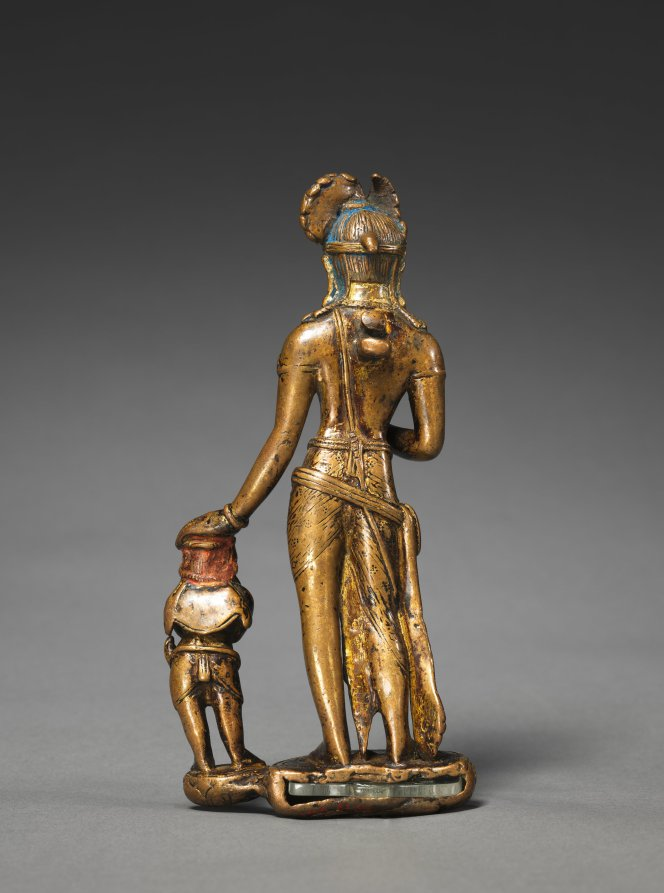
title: Bodhisattva Vajrapani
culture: Nepal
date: 700s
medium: copper with traces of gilt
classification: Sculpture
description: One of the earliest surviving tantric sculptures, this figure of Vajrapani—"he who holds the lightning bolt"—places his hand on a vajra, a thunder bolt symbol that refers to the lightning speed with which practitioners may achieve enlightenment when they follow tantric techniques. The prongs of the lightning bolt are in his hair; his arms are crossed, and a knotted snake is slung around his hips. Vajrapani's elaborate hairstyle, along with the gentle articulation of the cloth, subtly swaying postures, and introspective expressions are close derivations from 5th-century models, thereby implying an early date for the bronze.